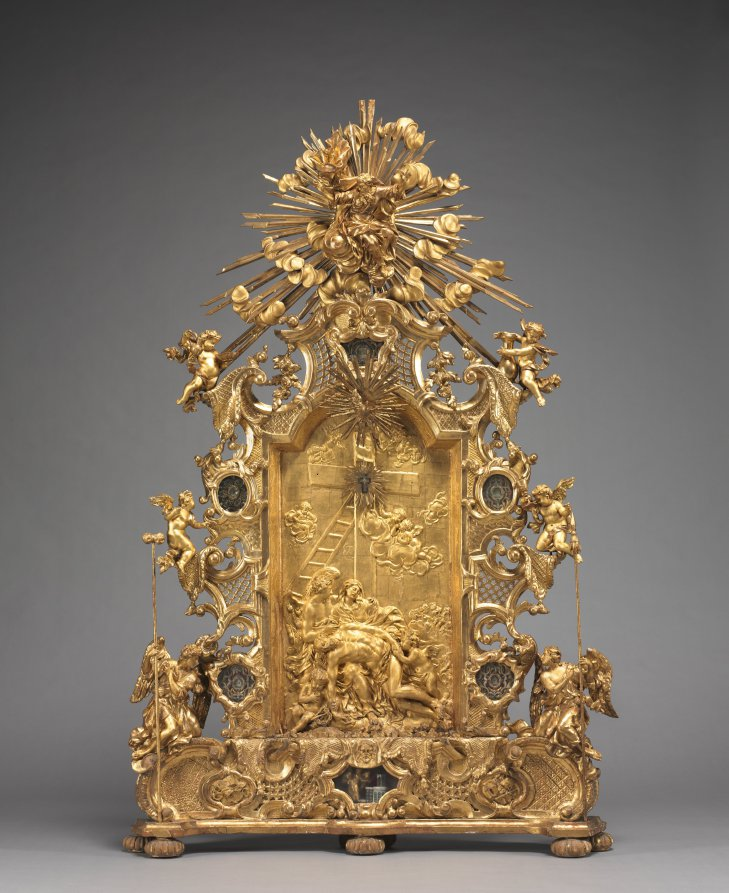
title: Altarpiece with Relics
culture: Germany, Bavaria, 18th century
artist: Joseph Matthias Götz (German, 1696–1760)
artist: and Workshop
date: c. 1735–40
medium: gilded wood, with relics in niches: gilded wood, mother-of-pearl, ebony, red silk, gold wire, seed pearls, rock crystal, pen and ink on paper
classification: Sculpture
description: Götz covers every surface in gold leaf, giving each part of the object equal importance, rather than simply framing a central picture. In this distinctively Central European approach, figural narrative is subordinate to the overall ensemble. Götz designed this object to rest on top of an altar, probably in front of a larger painted or sculpted decorative scheme. The work contains relics seen through the small windows on the perimeter. These small remains of holy figures demonstrate the persistence of a medieval Catholic tradition well into the 1700s.